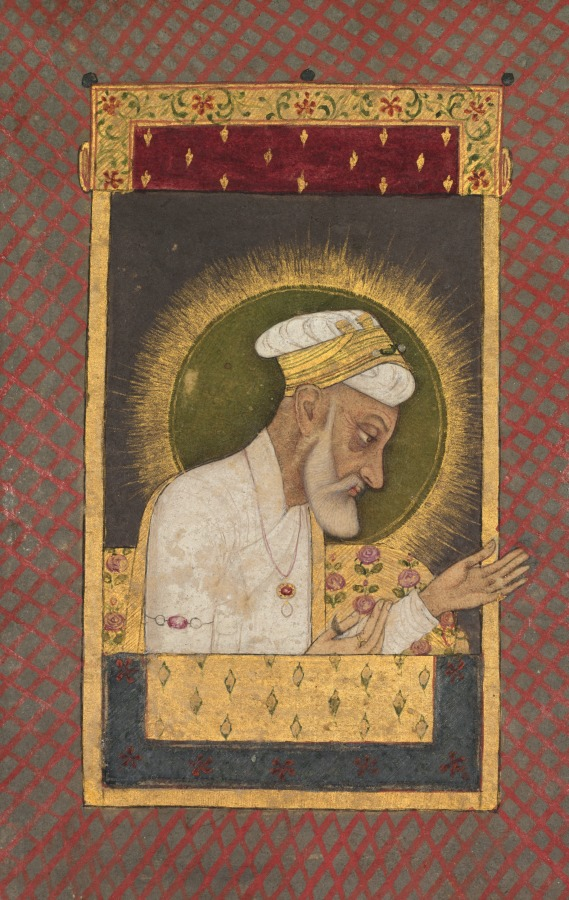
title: Portrait of Emperor Alamgir (Aurangzeb)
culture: Mughal India, Court of Alamgir (reigned 1658–1707)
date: c. 1700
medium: Gum tempera and gold on paper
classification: Painting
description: Appearing aged and benevolent, the sixth emperor of the Mughal dynasty in India sits at the jharokha window, in the attitude of dispensing favor on his subjects. Marked by a carpet draped over the railing as seen from the exterior of a palace, the jharokha window is where the emperor would come to show himself to the public. His halo indicates that he has divine grace behind him. This small portrait would have been gifted to a loyal supporter by order of the emperor.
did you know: Unlike his predecessors, Alamgir disapproved of alcohol and music.